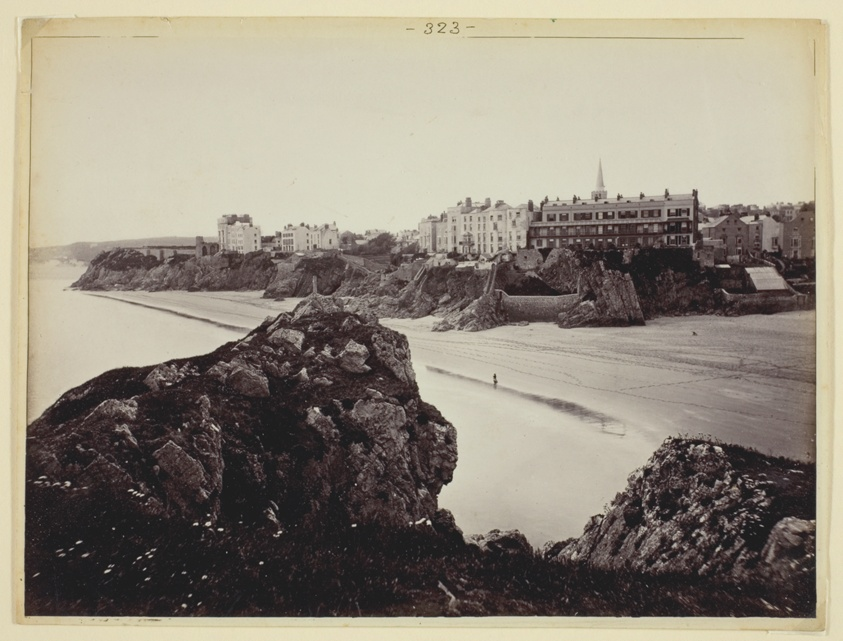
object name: Photograph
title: Untitled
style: 19th century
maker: Francis Bedford (English, 1816–1894)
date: 1860/94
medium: Albumen print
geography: England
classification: albumen silver print; photographic process; photography; photograph